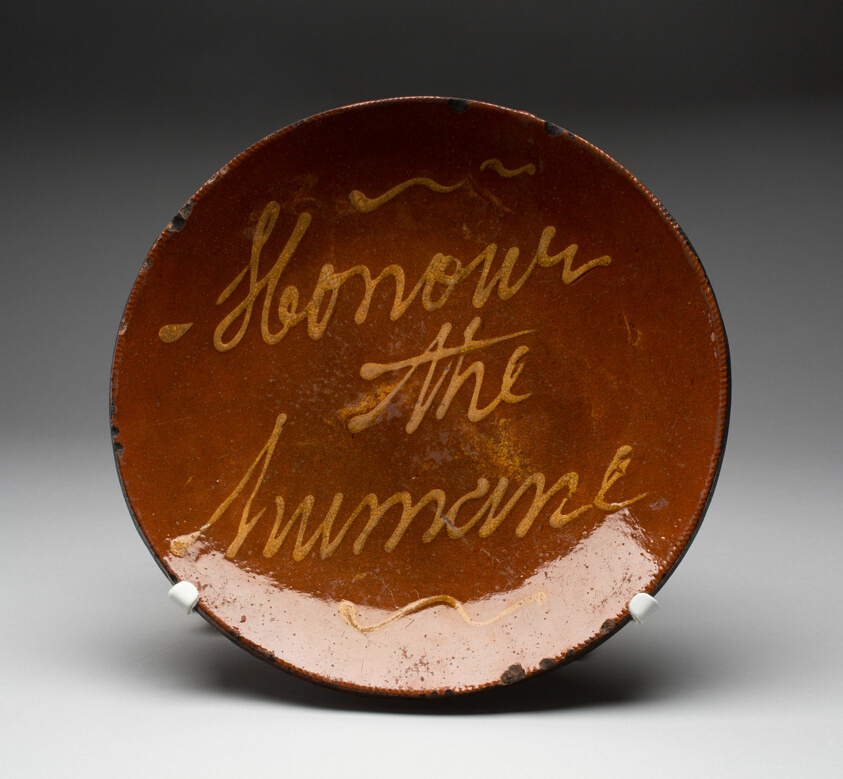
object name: Decorative Arts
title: Plate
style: pennsylvania german, american colonial, americas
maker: Artist unknown (American, 18th–19th century); New England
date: 1790–1850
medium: Earthenware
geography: Pennsylvania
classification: plate (general, dish); earthenware; dish (vessel); american decorative arts; american arts; ceramics; decorative arts